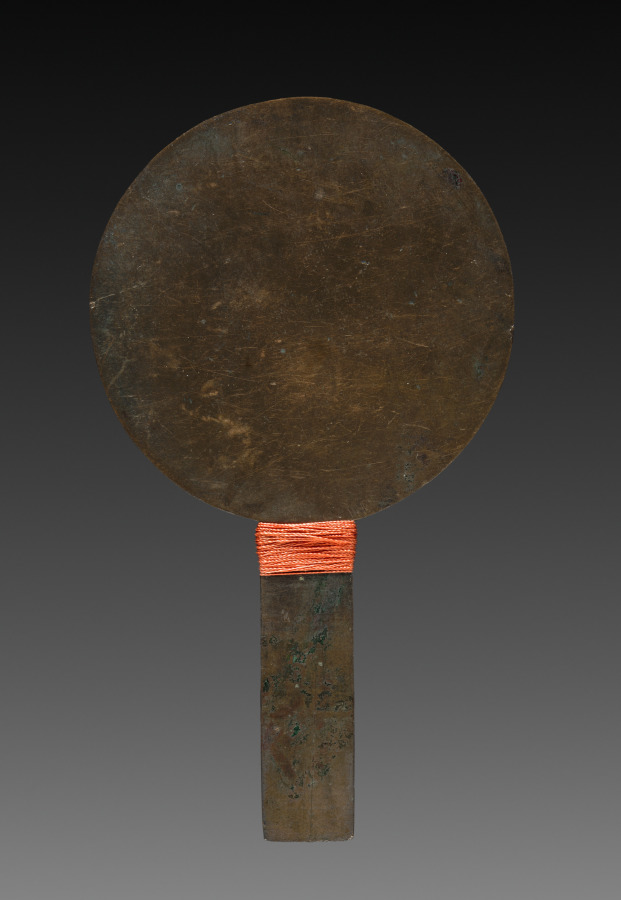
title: Mirror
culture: Japan, Edo period (1615–1868)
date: 1615–1868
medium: bronze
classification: Metalwork